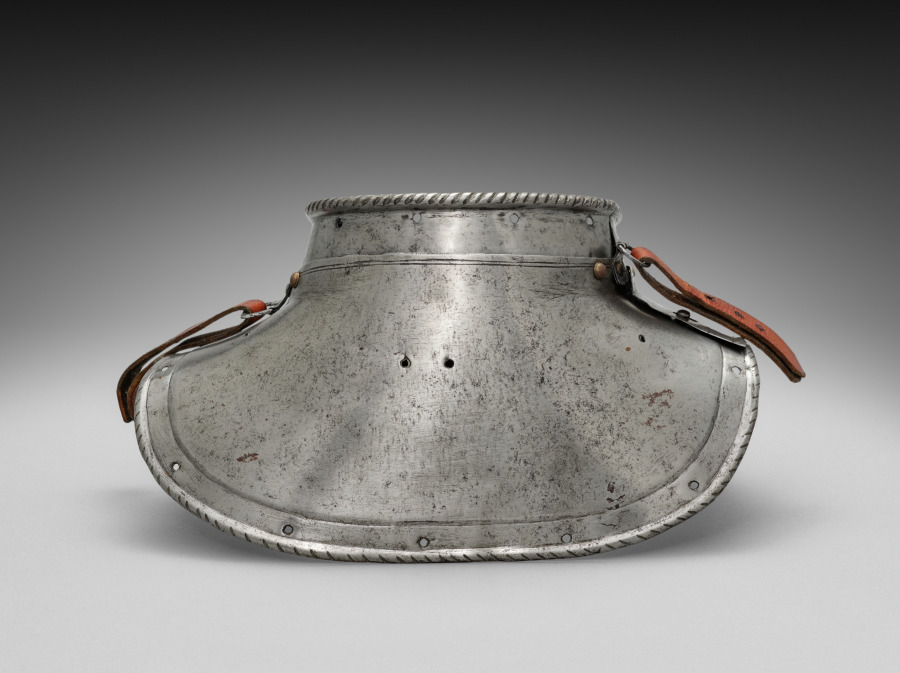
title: Colletin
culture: Germany, 19th century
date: 1801–1900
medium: steel with black paint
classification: Arms and Armor